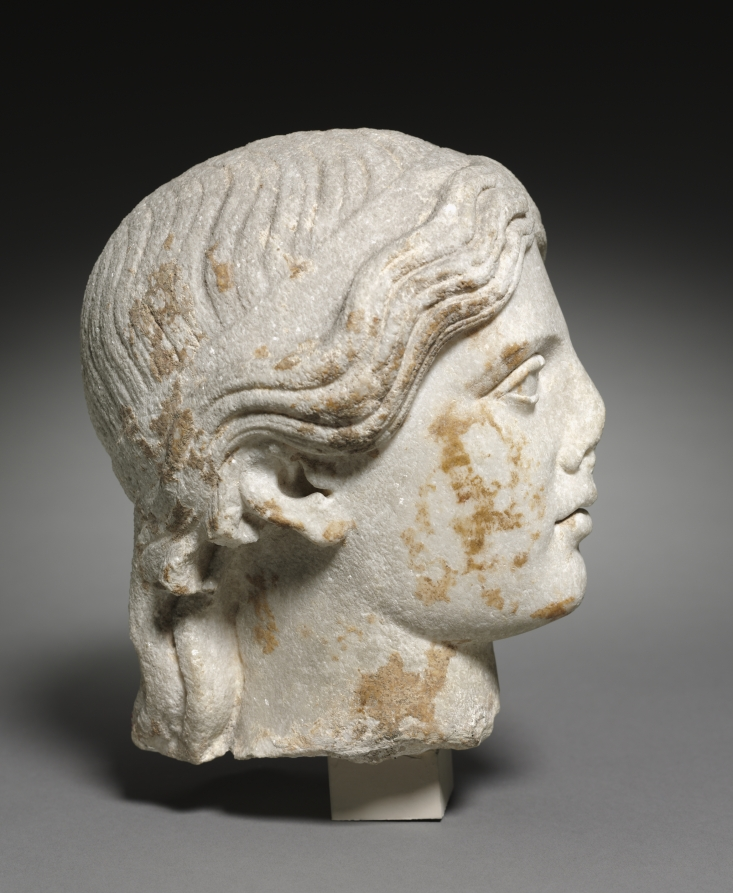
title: Idealized Head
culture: Italy, Roman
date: 50 BCE–100 CE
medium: dolomite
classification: Sculpture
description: This head combines an idealizing style with the serene expression that was characteristic of early Classical sculpture in Greece. Though copies of Greek masterpieces were popular in Rome during the late Republic and early empire, Romans also created many new sculptures that emulated the Classical style, which they felt conveyed a sense of the divine. This statue was probably one such piece, borrowing iconographically and stylistically from various Greek examples.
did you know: This head could represent a woman or goddess, or a youthful god such as Apollo.